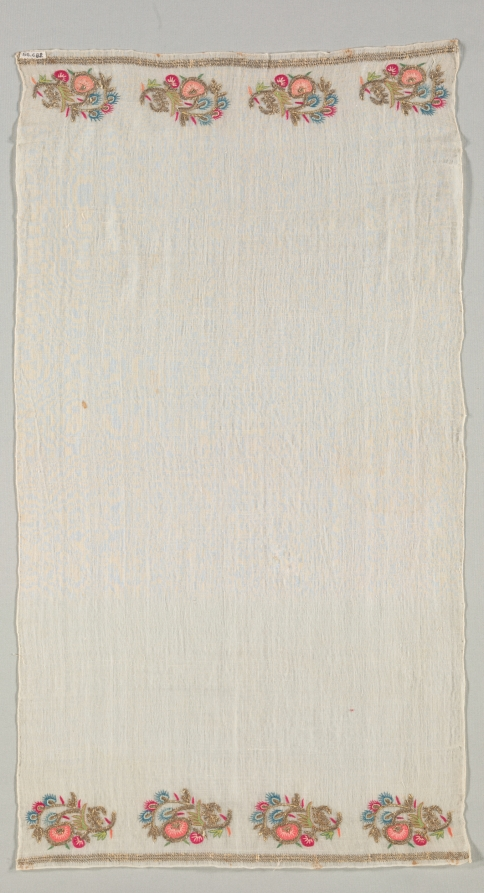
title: Embroidered Towel (Peshkir)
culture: Turkey, 19th century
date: 19th century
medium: embroidery; silk and gold filé on cotton tabby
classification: Embroidery